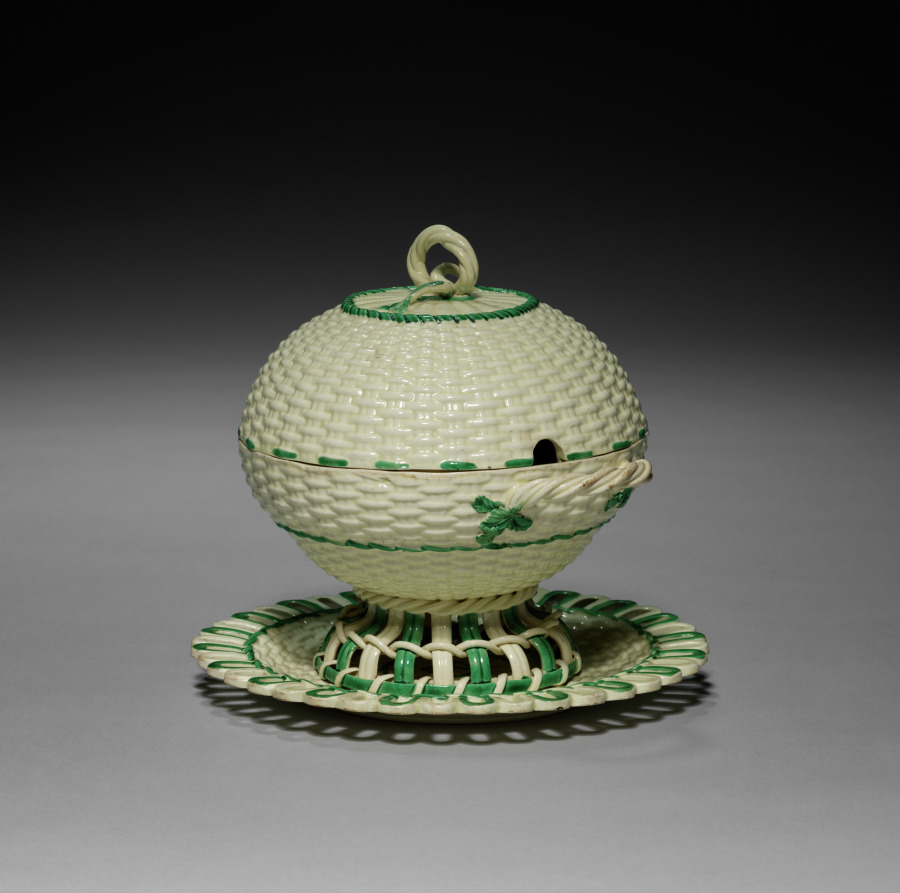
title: Wicker-Work Covered Sauce Tureen on Stand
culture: England, 18th-19th century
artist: Wedgwood Factory (British)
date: c. 1780–1840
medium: earthenware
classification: Ceramic